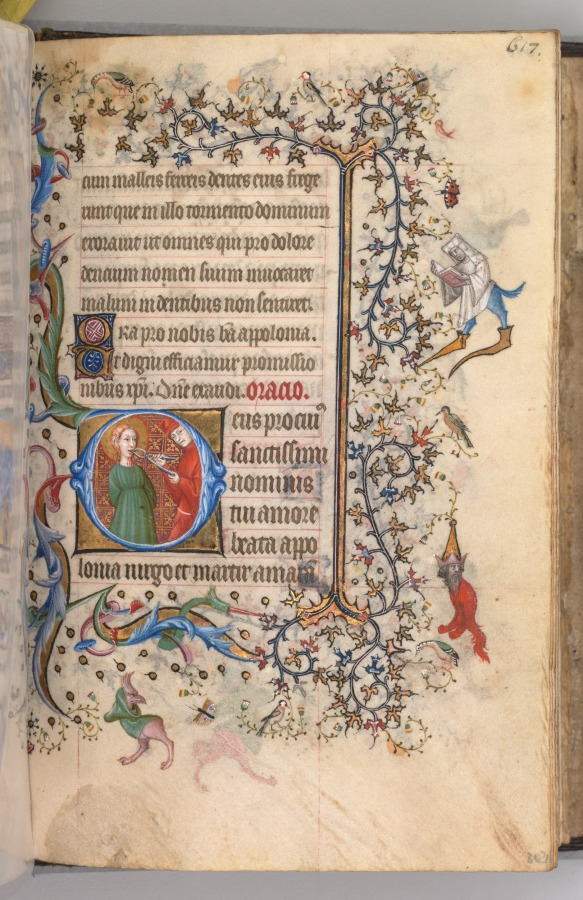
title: Hours of Charles the Noble, King of Navarre (1361-1425): fol. 303r, St. Apollonia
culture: France, Paris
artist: Master of the Brussels Initials and Associates (French)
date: c. 1405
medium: ink, tempera, and gold on vellum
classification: Bound Volume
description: This precious volume was obviously highly prized by its owner, the French-born King of Navarre, who had his coat of arms painted on no less than twenty folios. Rather than directly commissioning this manuscript from a specific workshop, it seems that Charles the Noble acquired his book of hours -- perhaps ready-made for the luxury market -- while on a trip to Paris in 1404-05. A collaborative effort, six painting styles are evidenced within the pages of this codex, those of two Italians, two Frenchmen, and two Netherlanders. The painter who was responsible for the planning and decoration of the book, and who produced seventeen of the large miniatures, was a Bolognese artist known as the Master of the Brussels Initials. His principal assistant, responsible for most of the borders, was a Florentine who signed his name "Zecho" da Firenze on folio 208 verso.